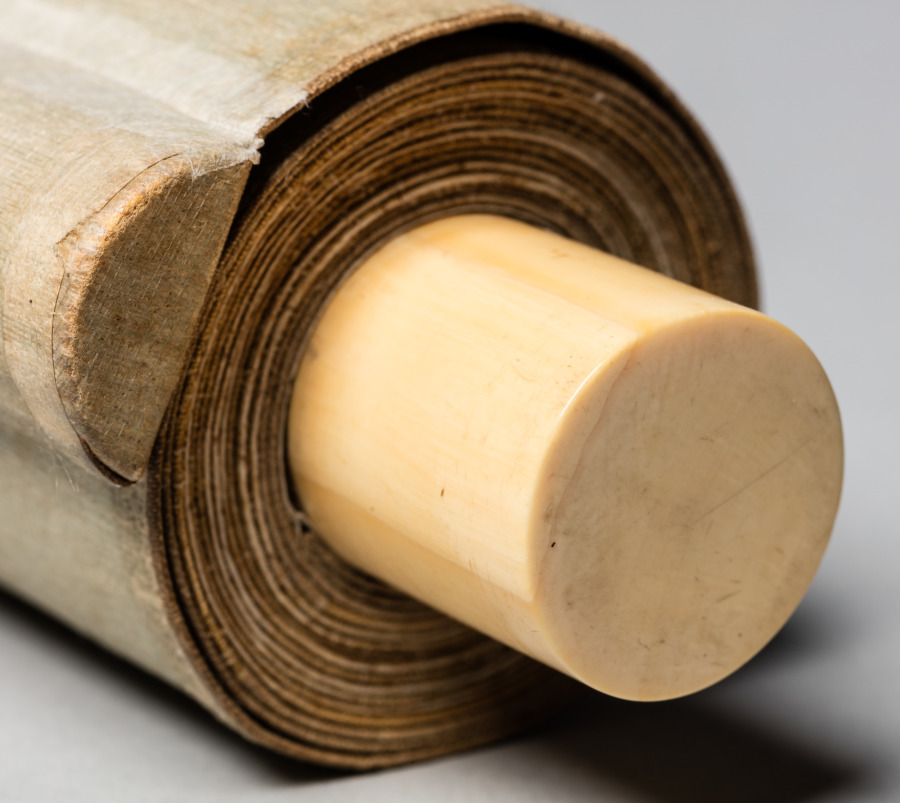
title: Landscape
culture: Japan, Muromachi period (1392–1573)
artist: Judō (Japanese, active 16th century)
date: 1500s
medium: hanging scroll, ink and light color on paper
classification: Painting